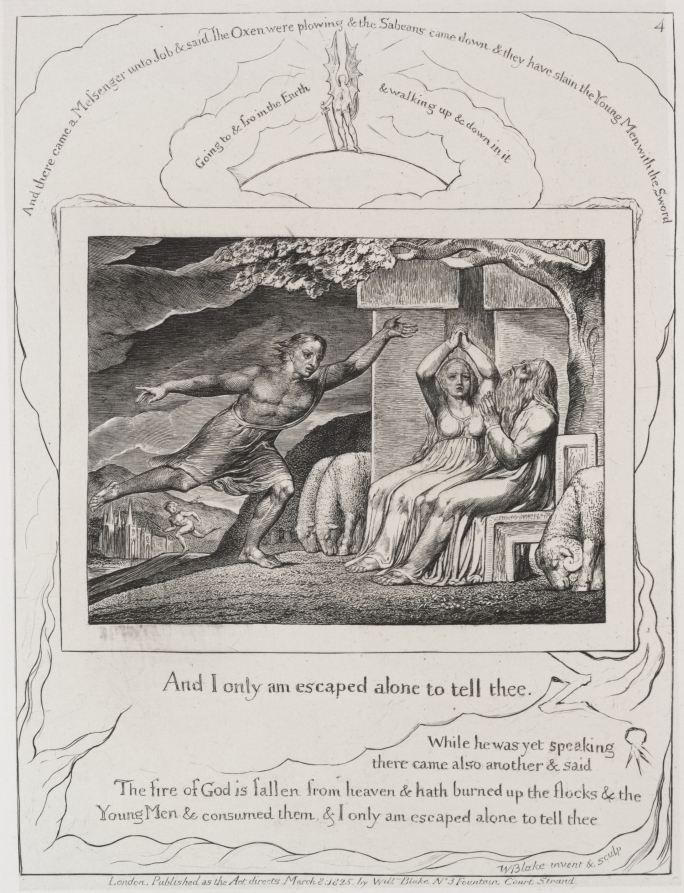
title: The Book of Job: Pl. 4, and I only am escaped alone to tell thee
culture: England, 19th century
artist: William Blake (British, 1757–1827)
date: 1825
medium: engraving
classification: Print